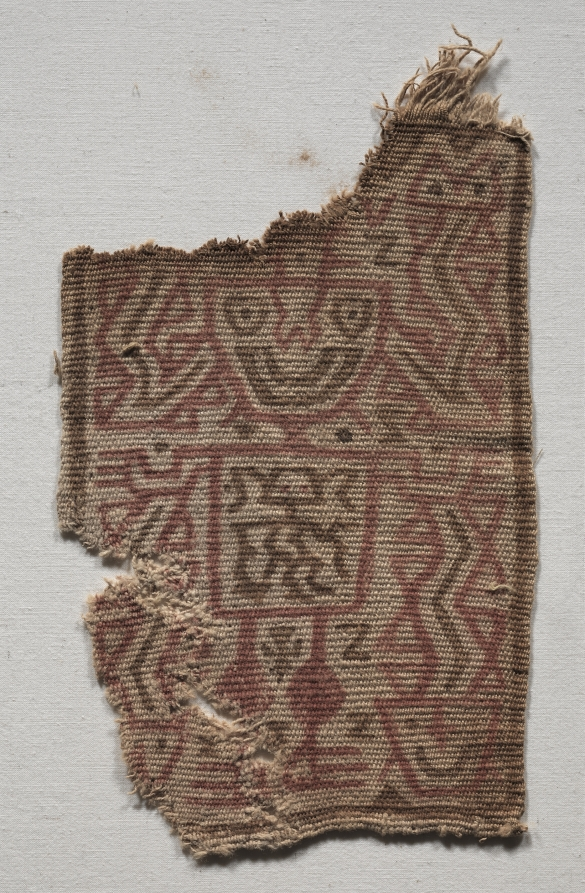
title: Mummy Bundle "Mask"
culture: Peru, South Coast, Ica Valley, Ocucaje site, Paracas style (700 BCE–1 CE)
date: 200–1 BCE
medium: plain warp-faced cloth, painted: cotton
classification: Textile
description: The Paracas people of Peru's south coast buried their dead in pear-shaped mummy bundles made of a seated human body carefully wrapped in garments and other textiles. Sometimes a painted cloth was placed at the top of the bundle, as if serving as the bundle's face, head, or "mask." The cloth was padded on the back so it curved outward like a face, and the tress-like yarns (unwoven warps) at the upper edge were arranged around a solid cotton disk that, in turn, was wrapped with a headband. Some cloths were painted with mask-like faces, and others with full figures, apparently mythical creatures.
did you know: These masks fall into two categories, those with only a face and those with a full-bodied figure.